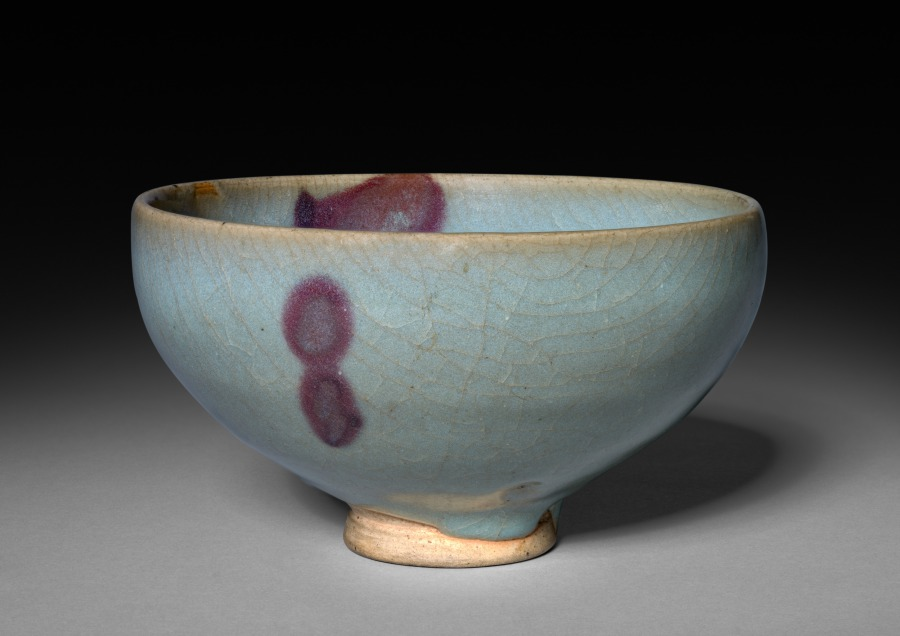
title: Bowl: Jun ware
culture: Northern China, Jin dynasty (1115-1234) - Yuan dynasty (1271-1368)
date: Jin dynasty (1115–1234) - Yuan dynasty (1271–1368)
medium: glazed buff stoneware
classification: Ceramic